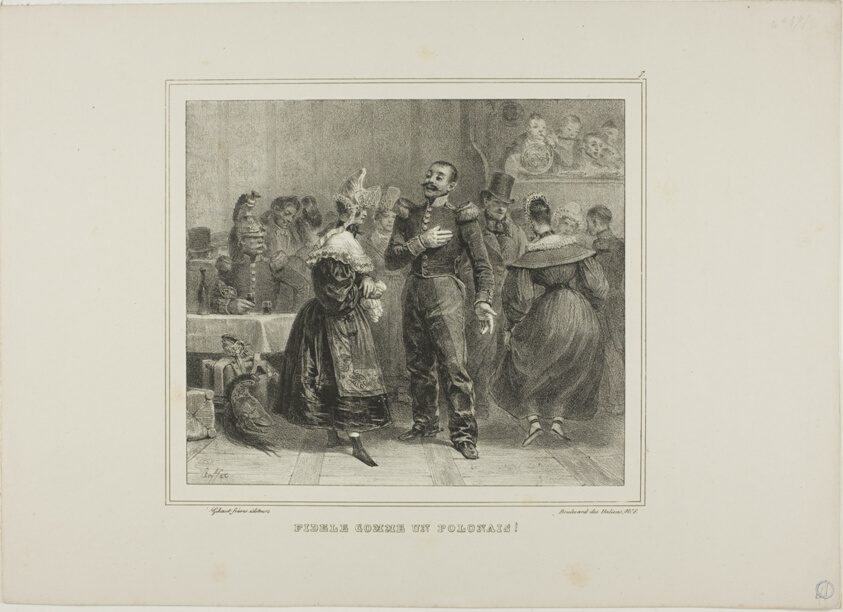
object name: Print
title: Faithful as a Polish Man!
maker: Denis Auguste Marie Raffet (French, 1804-1860); printed by Chez Gihaut Frères (French, 19th century)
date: 1833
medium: Lithograph in black on ivory wove paper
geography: France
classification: lithograph; print; prints and drawing